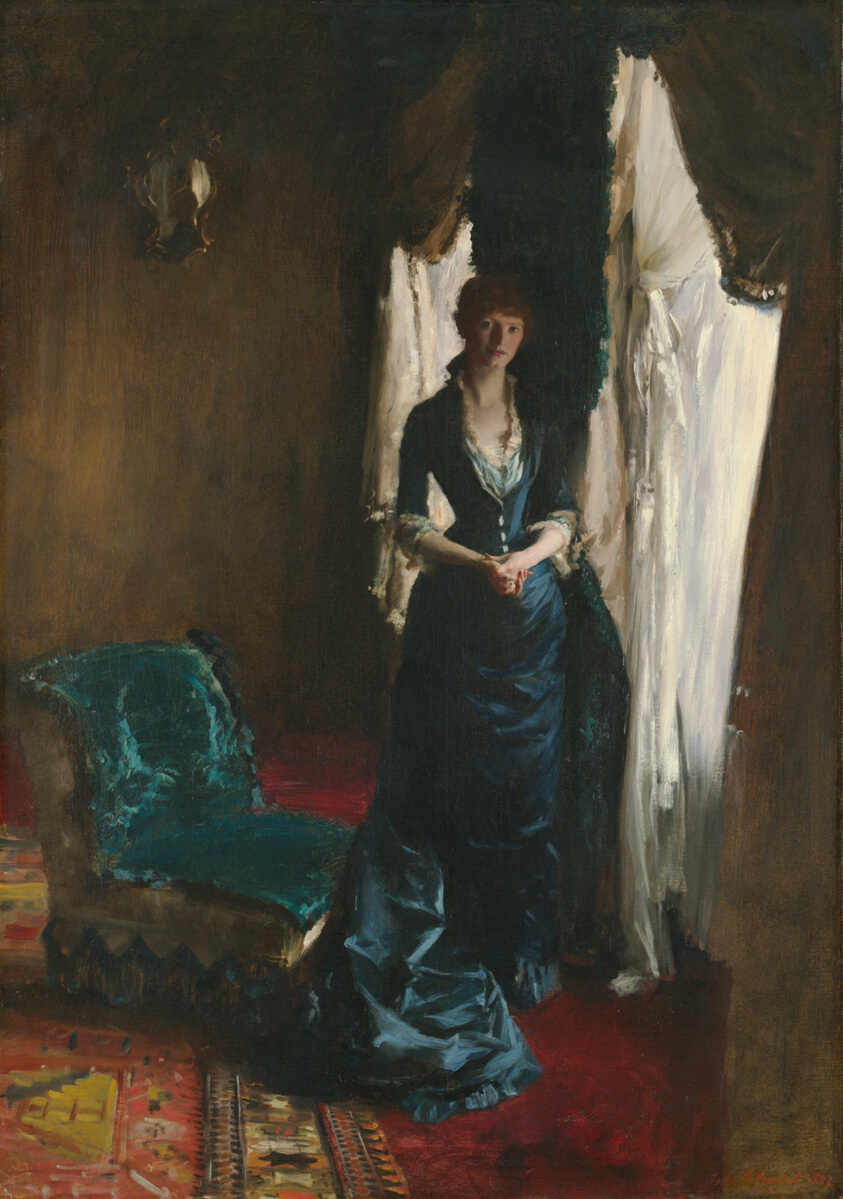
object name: Painting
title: Madame Paul Escudier (Louise Lefevre)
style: Impressionism, Realism, Modernism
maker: John Singer Sargent (American, 1856–1925)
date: 1882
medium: Oil on canvas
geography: United States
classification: oil on canvas; painting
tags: portraits, Chicago, fashion, people